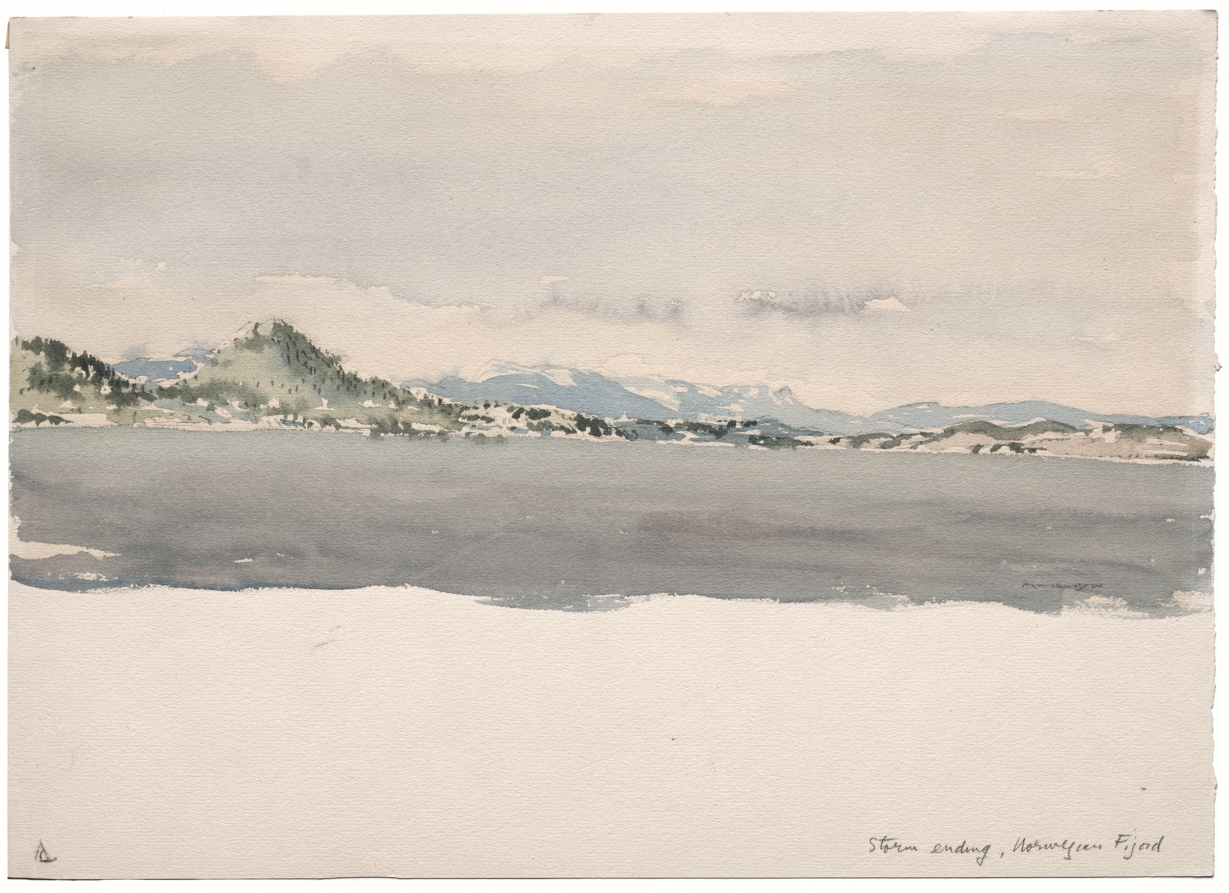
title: Storm Ending, Norwegian Fijord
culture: England, 20th century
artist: Muirhead Bone (British, 1876–1953)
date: c. 1896–1953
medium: watercolor and graphite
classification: Drawing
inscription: Lower right, in graphite: Muirhead Bone